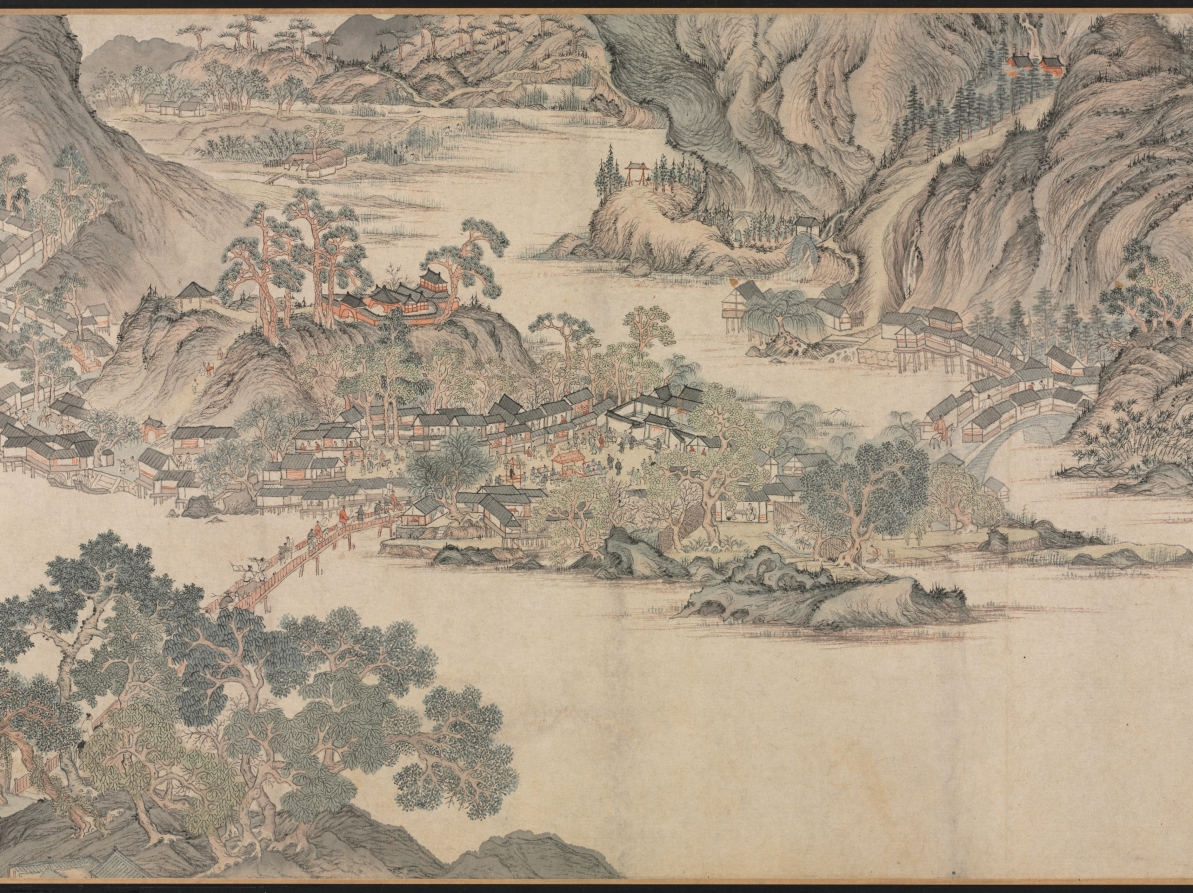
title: Greeting the Spring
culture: China, Ming dynasty (1368–1644)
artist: Wu Bin (Chinese, active c. 1591–1626)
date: 1600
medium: handscroll; ink and light color on paper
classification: Painting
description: This masterfully composed landscape in light colors and delicate brushwork is an image of the water-rich Jiangnan region in southeast China, where Wu Bin was active as an artist. Embedded in rolling hills along lakesides and streams nestle cityscapes hosting numerous spring festivities. Lantern displays and street performances in the villages salute the New Year, and are interwoven with scenes of farming, fishing, and silk making. In one scene in the middle ground, an ox made of clay under a canopy is lead in a procession to an architectural compound, a ceremony known as whipping the spring ox in hope for a good harvest. This handscroll bears five collector seals by the Qianlong emperor indicating his appreciation for the painting.